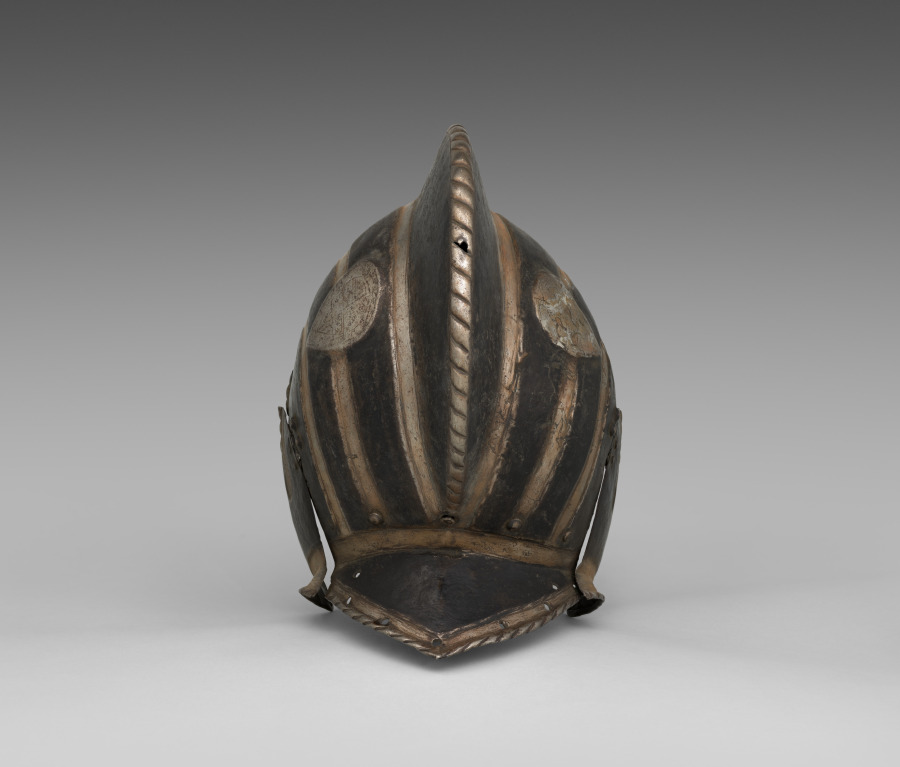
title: Black and White Burgonet (of the Civic Guard of Bologna)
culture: Italy, late 16th Century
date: c. 1580–1600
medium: steel with black paint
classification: Arms and Armor